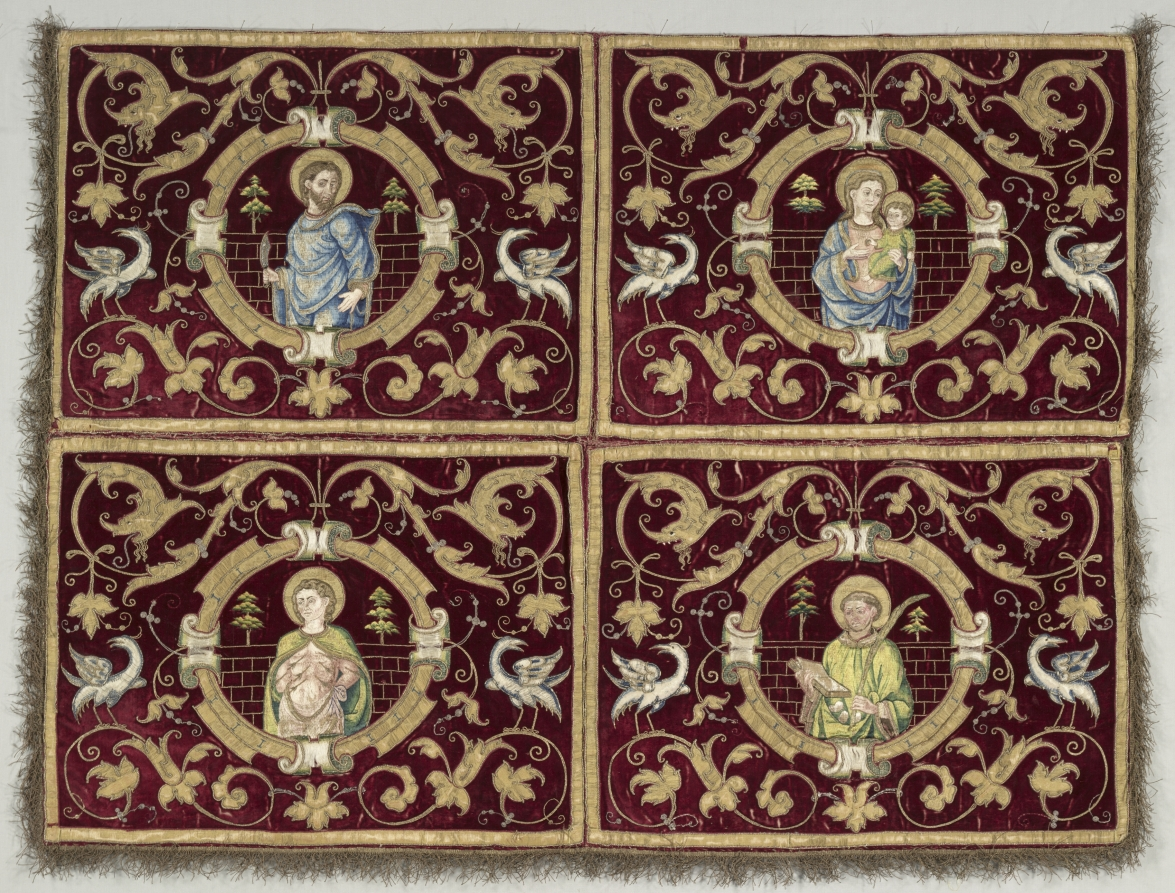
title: Embroidered Fragments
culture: Spain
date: 1500s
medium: appliqué embroidery, couched gold on velvet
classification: Velvet